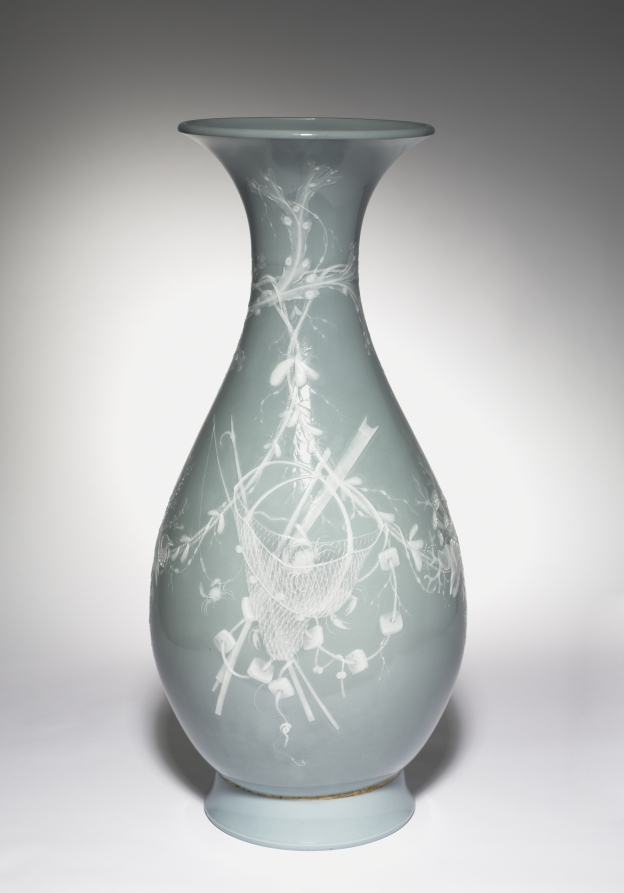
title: Vase Bertin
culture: France, 19th century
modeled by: Jules-Constant Peyre (French, 1811–1870?)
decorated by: Léopold Jules Gély (French)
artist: Sèvres Porcelain Factory (French, est. 1756)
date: c. 1855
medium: porcelain with pâte-sur-pâte decoration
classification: Ceramic